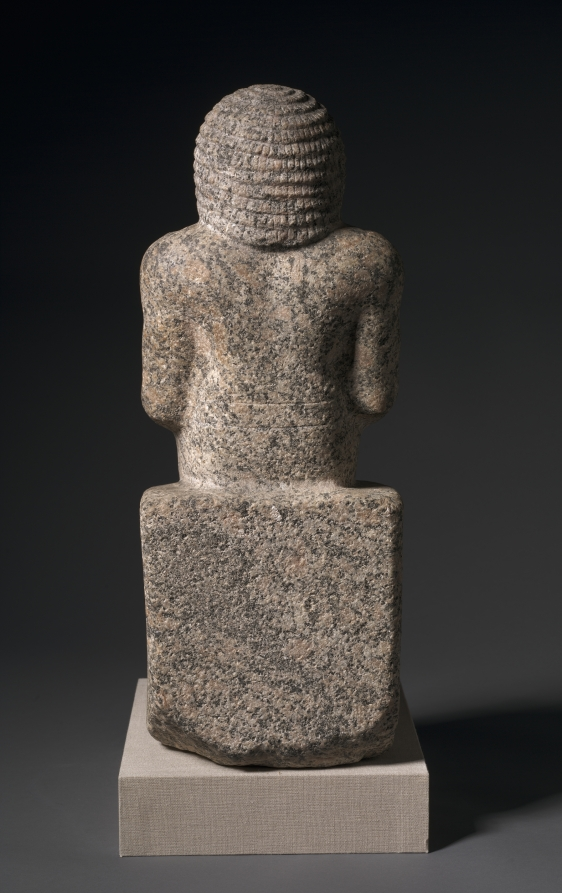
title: Seated Statue of Nykara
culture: Egypt, Old Kingdom (2647–2124 BCE), Dynasty 5, reign of Nyuserre (2445–2422 BCE) or later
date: 2408–2377 BCE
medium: red granite and pigment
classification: Sculpture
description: This statue inscribed on the base for the chief of the granary, Nykara, comes from the same tomb as the false door. A statue of granite was an expensive commodity. Monumental red granite was quarried at Aswan in the south of Egypt and had to be shipped more than five hundred miles downstream to Nykara's tomb in the area of Memphis.